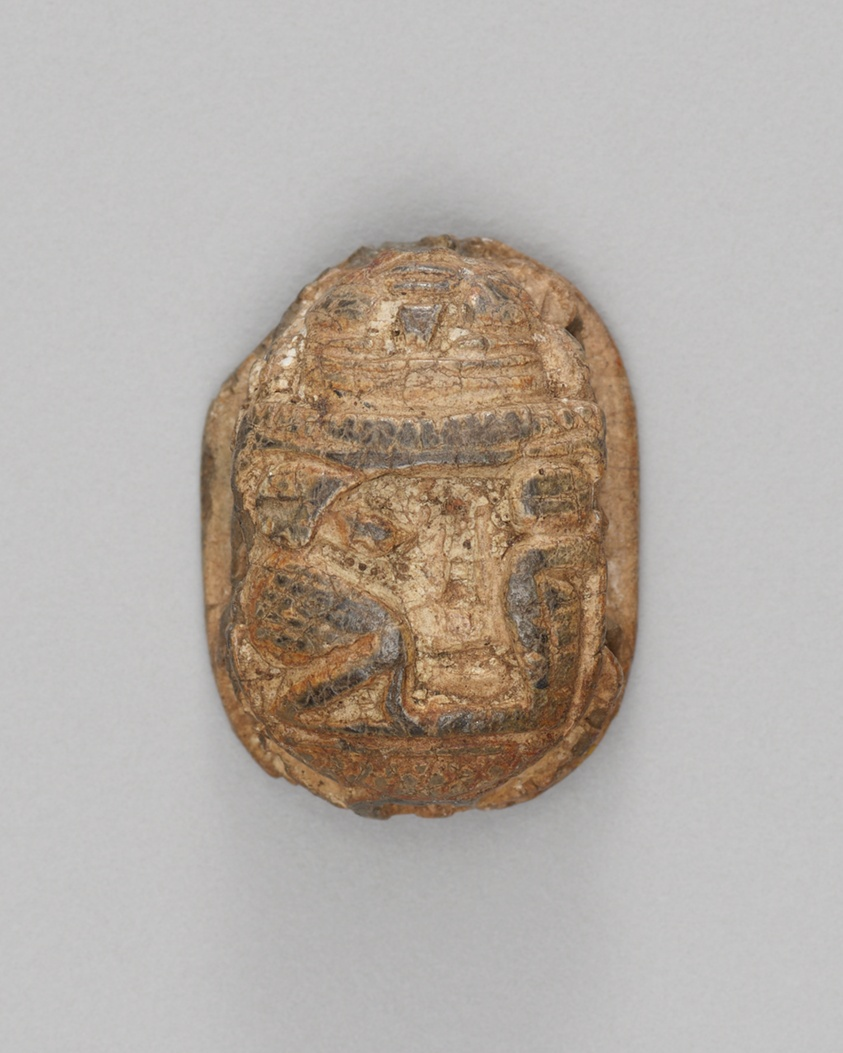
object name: Costume and Accessories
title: Scarab: Inscription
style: middle kingdom, egyptian, ancient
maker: Egyptian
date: Middle Kingdom (about 2055-1650 BCE)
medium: Steatite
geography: Egypt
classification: scarab; ancient art; costume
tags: Hieroglyphs